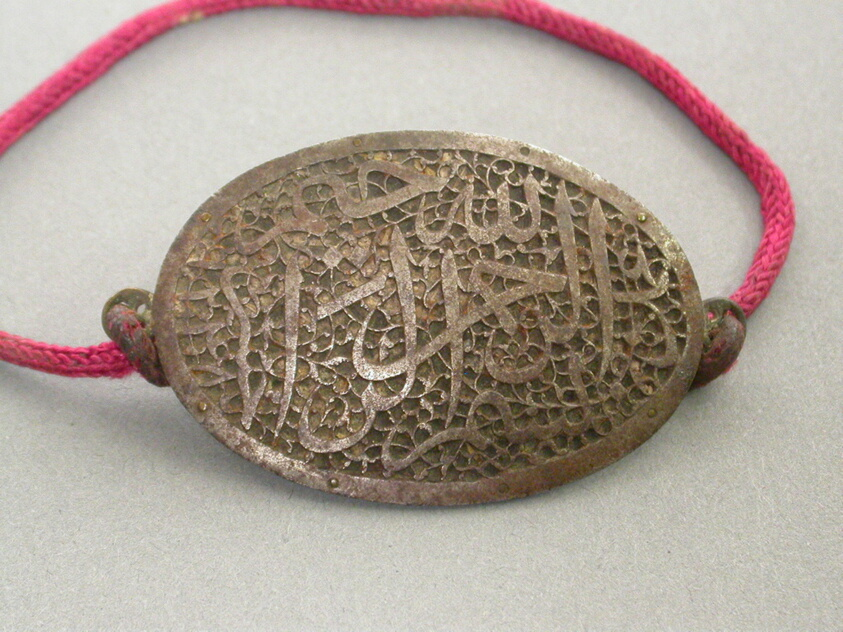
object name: Costume and Accessories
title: Armband Amulet (Bazuband) Inscribed "In the Name of God"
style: isfahan, Islamic (culture or style)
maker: Iran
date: Qajar dynasty (1796–1925), 19th century, dated 1832 (1248 A.H.)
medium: Steel with pierced decoration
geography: Iran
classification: metal; jewelry; decorative object/ornament; asian art; costume